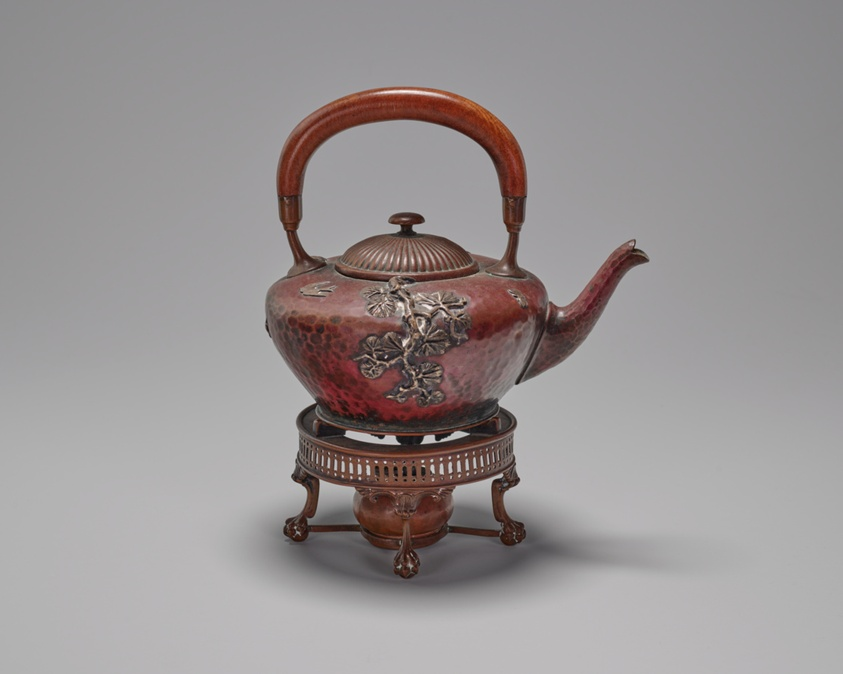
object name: Decorative Arts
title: Tea Kettle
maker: Gorham Manufacturing Company (American, founded 1831); Providence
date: c. 1900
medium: Copper, mixed metals, and wood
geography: Providence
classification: american decorative arts; decorative arts